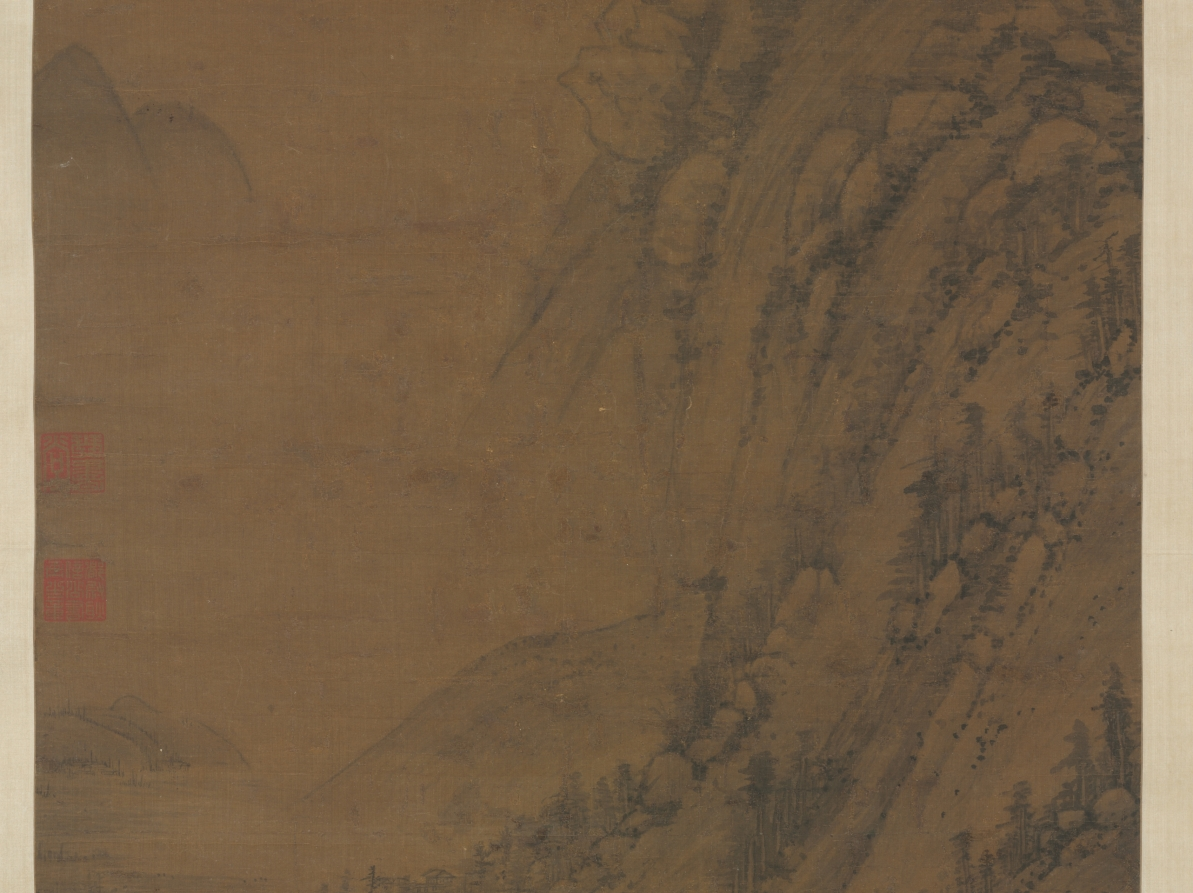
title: Summer Mountains (after Dong Yuan [active c. 937–75])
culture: China, Yuan dynasty (1271-1368)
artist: attributed to Huang Gongwang (Chinese, 1269–1354)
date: 1290–1354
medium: hanging scroll; ink and slight color on silk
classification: Painting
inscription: 【印】一峰道人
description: This monumental landscape is drawn in softly rounded strokes with darker lines frequently applied on top of lighter ones. This technique recalls one of the suggestions included in a collection of the artist's writings known as Secrets of Landscape Painting: The most difficult thing in painting is using the ink. The artist begins by using dilute ink and builds it up to the point where it begins to look right, then uses dense, black ink, applied fairly dry, and washes of deeper-toned ink. This technique distinguishes the fields from the paths, the far from the near. Huang Gongwang may have learned this technique from observing nature through the eyes of an earlier master, Dong Yuan, a painter whose style he shared.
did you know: The wet hills and moist, rich atmosphere evoke the southern Chinese summer, characterized by monsoon rains and lush growth.